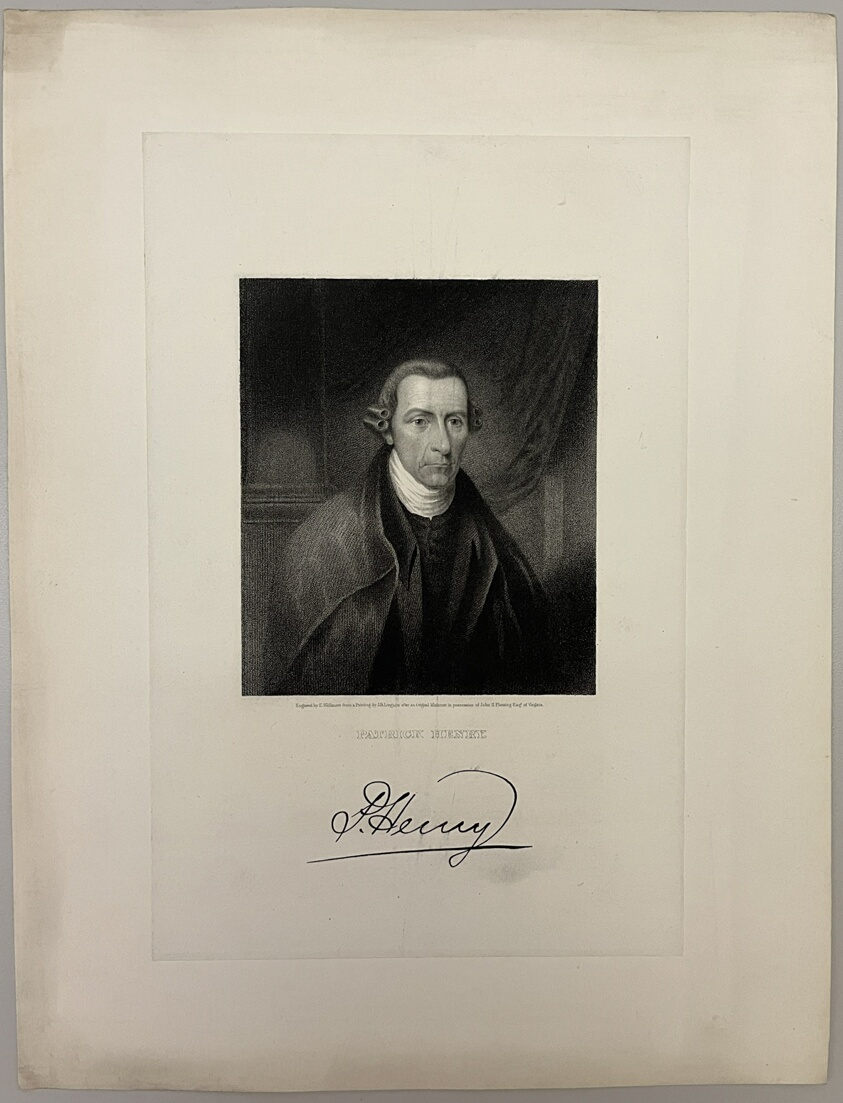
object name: Print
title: Patrick Henry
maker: Edward Wellmore (American, active mid-19th century); after James Barton Longacre (American, 1794-1869); after Lawrence Sully (American, 1769-1803)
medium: Stipple engraving on paper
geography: United States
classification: reproduction; print; prints and drawing